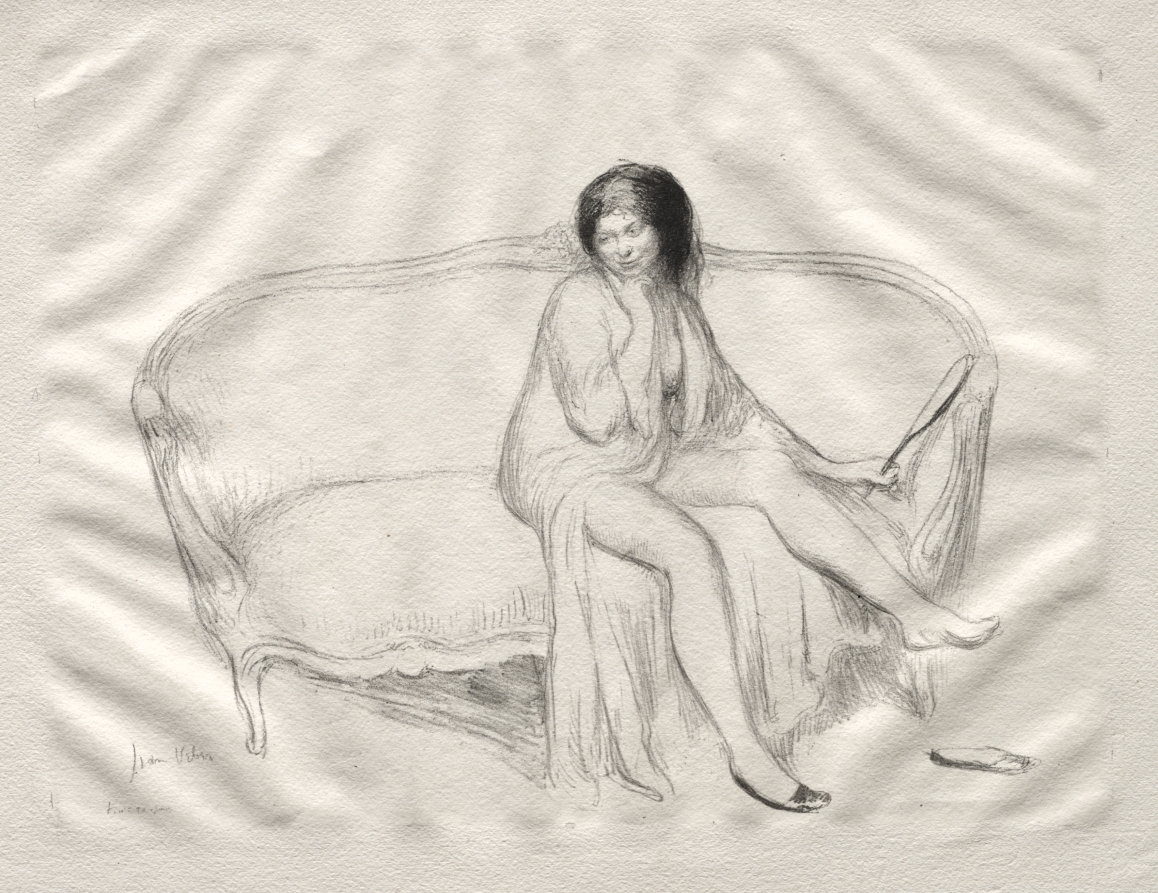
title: Nude Woman Seated on a Sofa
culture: France, 19th century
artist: Jean Veber (French, 1864–1928)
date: c. 1885–1928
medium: lithograph, hand colored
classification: Print